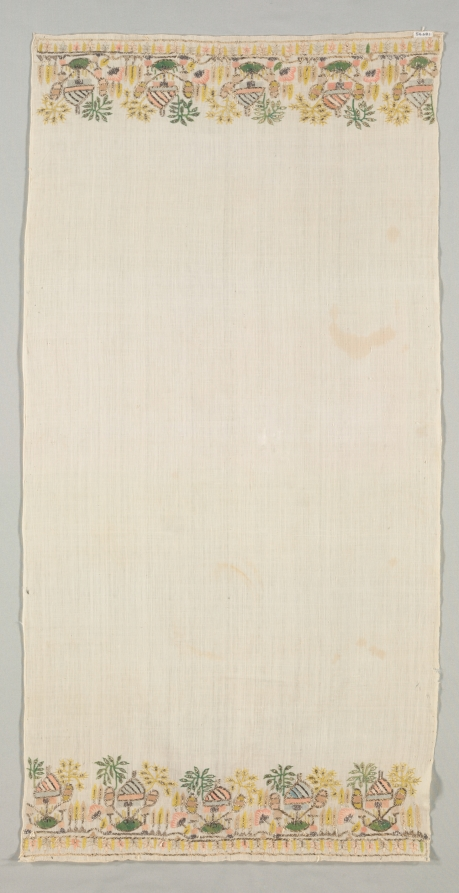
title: Embroidered Towel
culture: Turkey, mid 18th century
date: mid 18th century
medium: embroidery; silk and gold filé on cotton tabby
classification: Embroidery